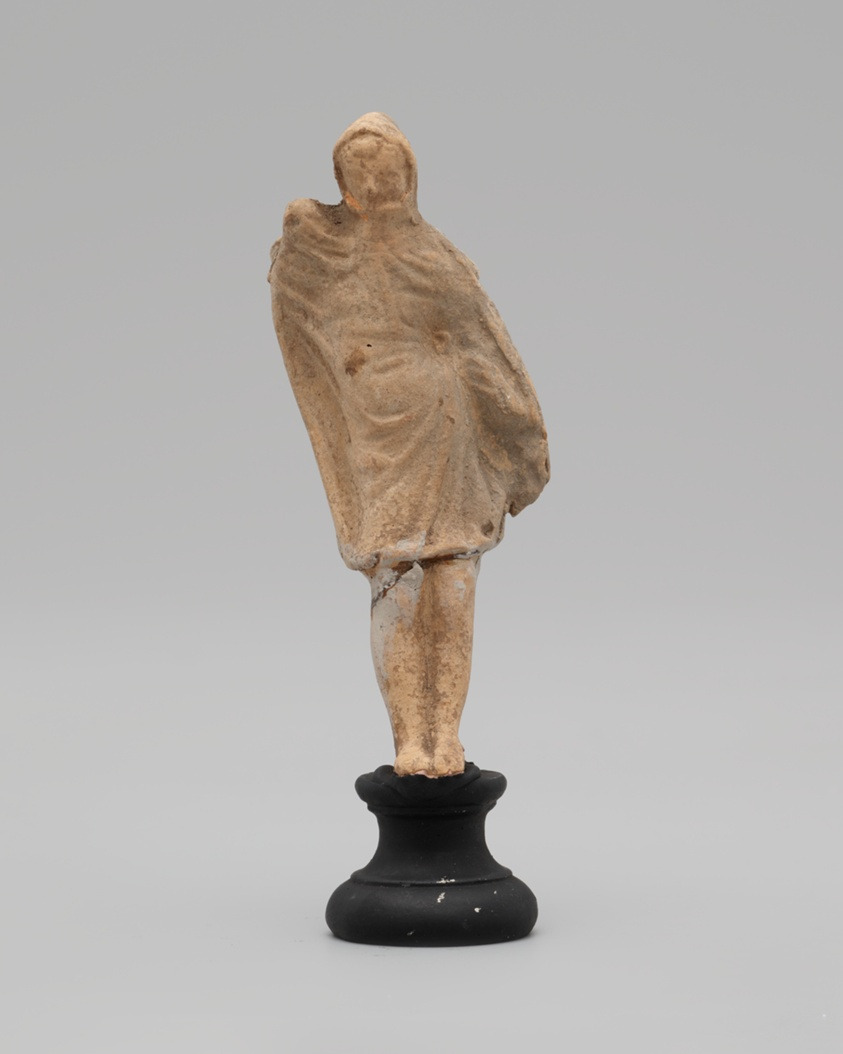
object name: Sculpture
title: Figurine of a Man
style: greek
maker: Greek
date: 4th-3rd century BCE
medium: terracotta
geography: Greece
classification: earthenware; ceramics; sculpture; ancient art